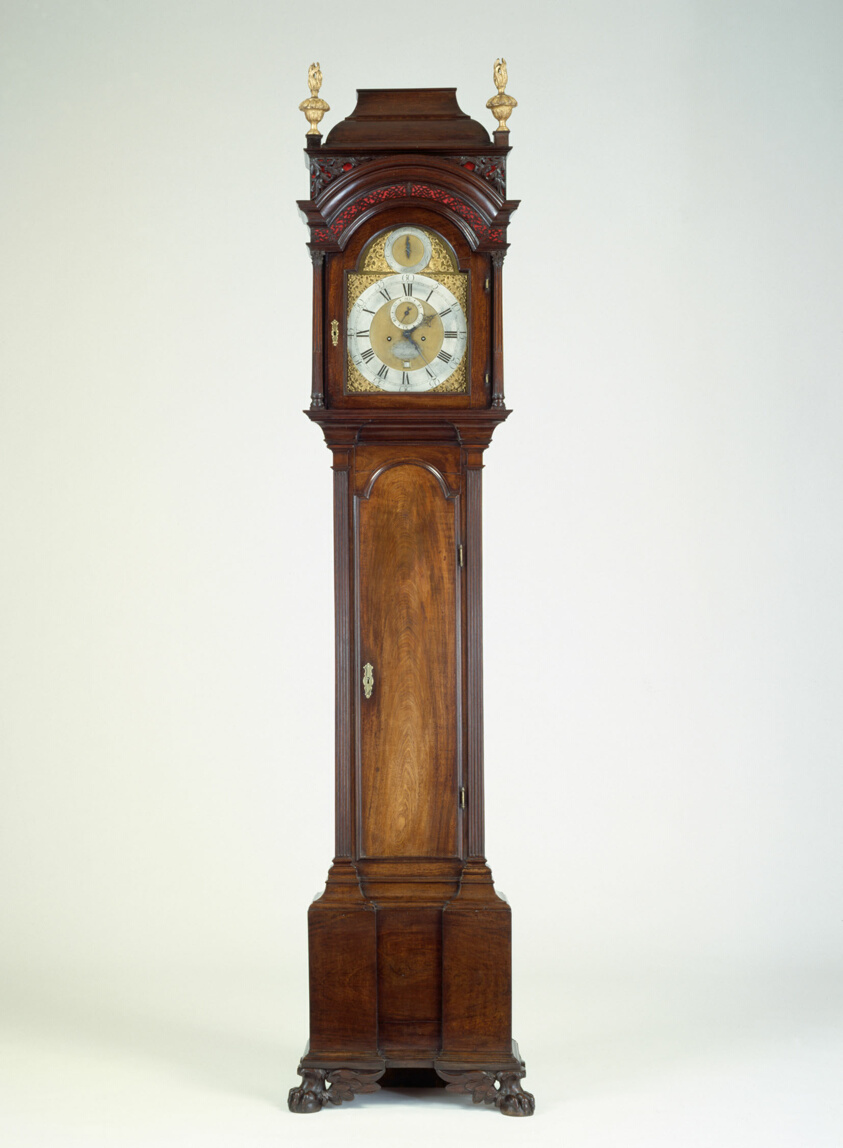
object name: Decorative Arts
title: Tall Case Clock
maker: Movement by Thomas Hughes; London, active 1750–1783; Case attributed to George Glinn (Glenn); Irish, worked in Boston, mid 18th century; Boston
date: c. 1750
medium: Mahogany and New England white pine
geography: Boston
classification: case furniture; furniture; american decorative arts; american arts; decorative arts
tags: furniture